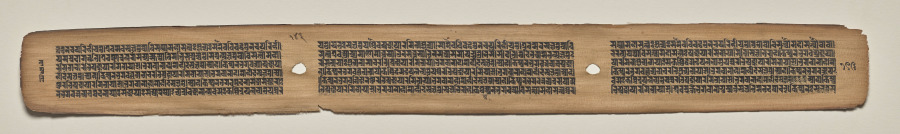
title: Text, Folio 143 (verso), from a Manuscript of the Perfection of Wisdom in Eight Thousand Lines (Ashtasahasrika Prajnaparamita-sutra)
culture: Eastern India, Bihar, Vikramashila Monastery. Painting: Nepal, Kathmandu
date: Sunday, September 14, 1119 (year 239 of the Newar Samvat in the month of Ashvina)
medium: gum tempera and ink on palm leaves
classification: Painting